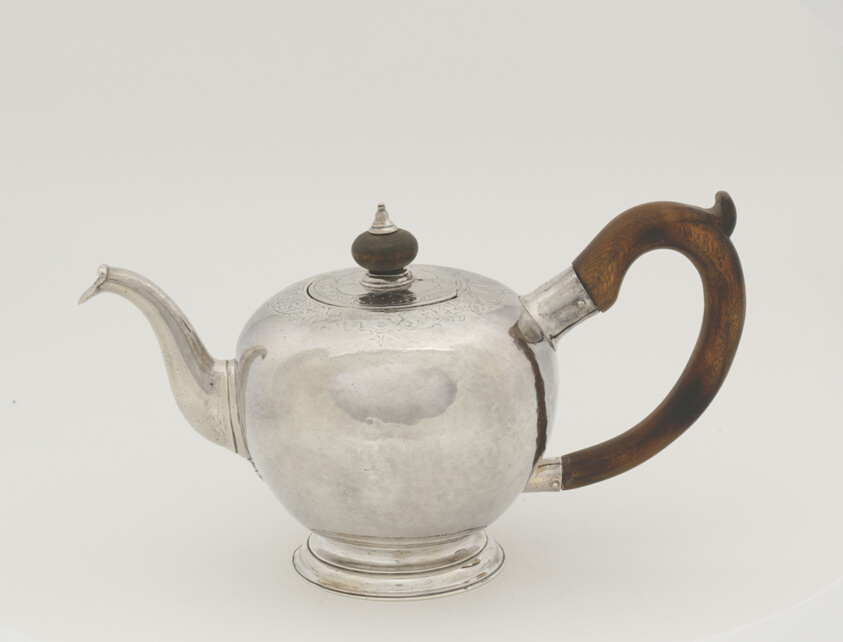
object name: Metalwork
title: Teapot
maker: Jacob Hurd; American, 1702/03–1758; Boston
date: 1740–55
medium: Silver and walnut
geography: Boston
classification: teapot; silver; american decorative arts; american arts; decorative arts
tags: dining, drinking